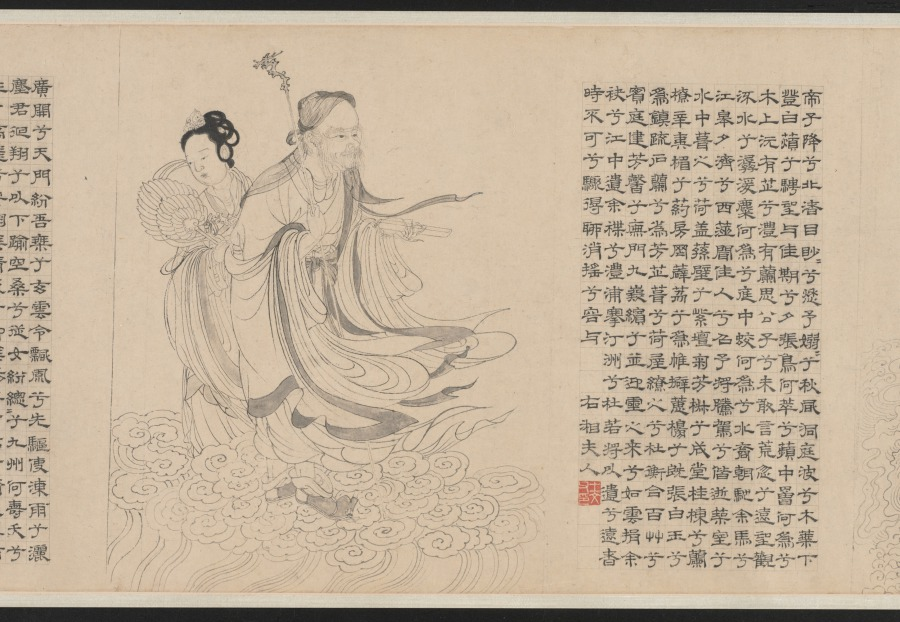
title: Nine Songs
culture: China, Yuan dynasty (1271-1368)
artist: Zhang Wo (Chinese, active c.1336–after 1364)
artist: Chu Huan (Chinese, active 1361)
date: 1361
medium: handscroll; ink on paper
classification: Painting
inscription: 7 colophons and 47 seals: 1 colophon, dated 1361, and 28 seals of Chu Huan 褚奐 (active c. 1361); 1 colophon, dated 1785, and 1 seal of Lu Shihua 陸時化 (1714-1779); 2 seals of Lu Yü-ch'ing (18th c.); 1 colophon, dated 1935, of Ye Gongchuo 葉恭綽 (1881-1968); 1 colophon, dated 1935, of Wu Hufan 吳湖帆(1894–1968); 1 colophon, dated 1938, and 1 seal of Wang Tongyu 王同愈 (1856-1941); 1 colophon, dated 1941, of Wu Huayuan 吳華源 (1893-1972); 1 colophon, dated 1942, and 9 seals of Xu Bangda 徐邦達 (1911–2012); 1 colophon, dated 1942, of Lang Jingshan 郎靜山 (1892-1995); 1 colophon, dated 1944, of Tang Yun 唐雲 (1910-1993); 6 seals of Wang Jiqian [C.C. Wang] 王季遷 (1907–2003).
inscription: Text of The Nine Songs written by Chu Huan at the end of each section.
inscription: 右離騷九歌圖，宋龍溟居士李公本，淮南張渥叔厚所畫妙絕當世。家藏請予書其辭目識于左。至正二十一年辛醜三月旦河南褚奐記。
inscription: Colophon by Lu Shihua 陸時化 (1714–1789): This scroll is fortunate to have been handed down from collections of the right people. Now, after 500 years, its condition is as good as when it was painted. I acquired this from Mr. Shen Guiyu [1673-1769], the President of the Board of Rites. The label is in his handwriting when he was 95 years old. I submit that Chu Huan (t. Shiwen) of the Yuan Dynasty was a native of Qiantang. His "seal" and li writings are in the style of Wu Rui. For example, in [Chu Kuei's] Ming ji lu [A list of masterpieces] is recorded the stele commemorating the restoration of the prefectural school of Kun-shan, the text of which was composed by Yang Weizhen in the twenty-first year of Zhizheng [1361]; and the calligraphy as well as the title in li style was by Chu Huan, who was at that time an assistant judge of the prefecture of Haining in the circuit of Hangzhou. Zhang Wo's zi is Shuhou (叔厚). His literary name is Zhen Qisheng (贞期生). According to [Gu Ying's] Yu shan cao tang ya jii, he liked to paint in the bai-miao or the "pure delineation" style after the method of Li Longmian [Li Gonglin 李公麟], which finds no peer among the ancient masters. This is agreed upon [by Pei Ch'iung] in his Qing jiang zhi who praised [Zhang Wo] as being quite learned and well-versed in many branches of the arts, especially figure painting. Recorded by Lu Shihua [The mountain dweller], listening to the pine, in the twelfth month of the yisi year [1785].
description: Painted in the baimiao, or fine-line drawing style, this ancient work demonstrates the literati’s use of abstract calligraphic brushwork for self-expression. The subject of the “Nine Songs”—songs associated with shamanistic rituals in the ancient Chu kingdom—had traditionally provided artists with myths and legends that they could explore and reinterpret in their own works.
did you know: Divided into eleven sections, the scroll contains illustrations by painter Zhang Wu followed by a transcription of the relevant verse by calligrapher Chu Huan.